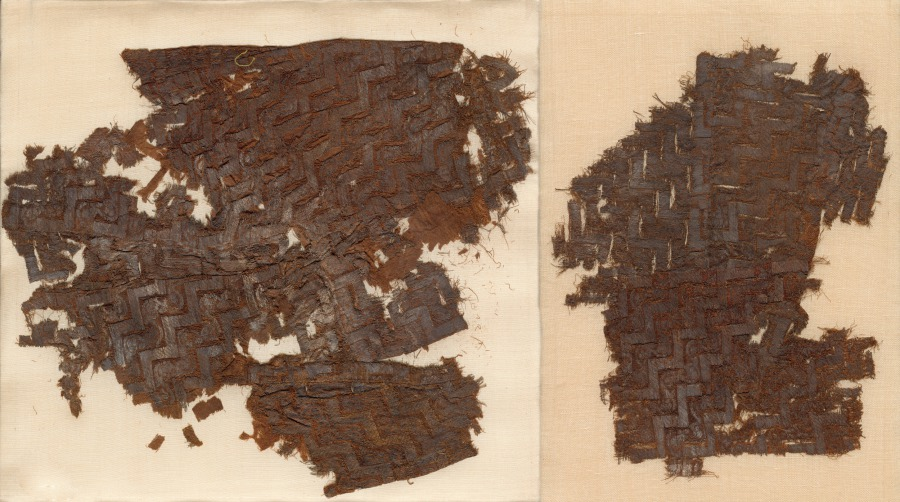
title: Fragments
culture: Unassigned, Probably Modern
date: before 1968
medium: silk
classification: Textile